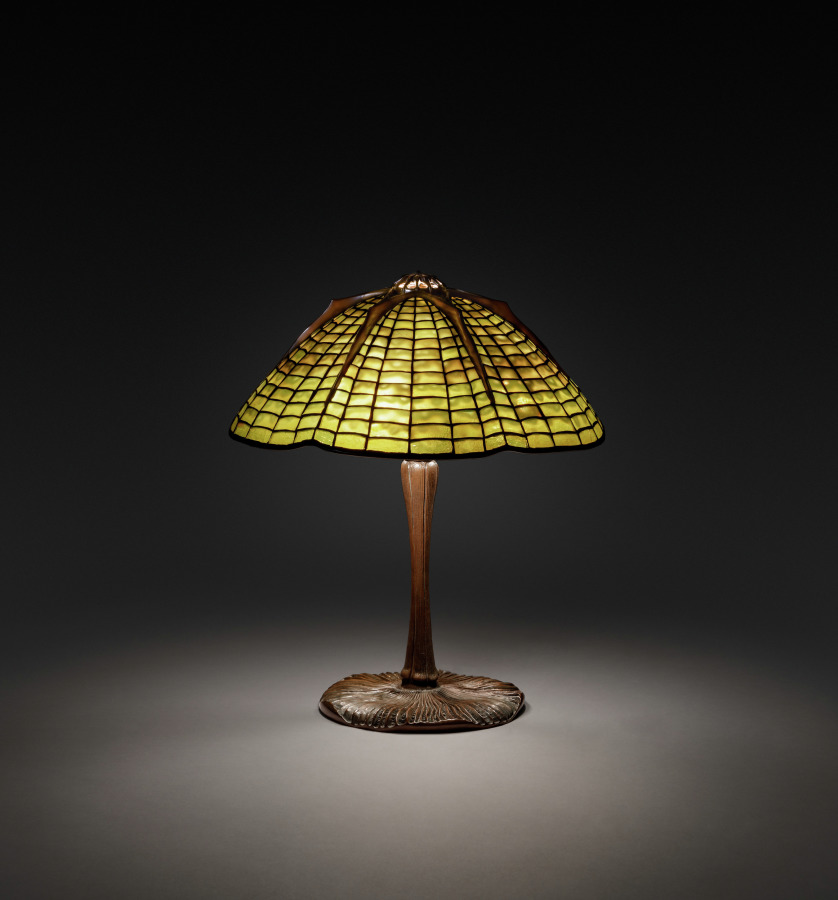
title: Spider and Web Table Lamp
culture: America, New York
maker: Tiffany Studios (United States, New York, 1902–32)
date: c. 1902–20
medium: Leaded glass, bronze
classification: Lamp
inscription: Shade impressed: TIFFANY STUDIOS NEW YORK 1424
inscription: Base impressed: TIFFANY STUDIOS/NEW YORK/337/ 2844 [scratched]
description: The dawn of the 20th century spurred fresh approaches to design. Louis Comfort Tiffany’s great contribution to this new art movement, termed the Art Nouveau, was not only the shimmering iridescence of his Favrile glass but also the naturalistic compositions of his lamps and windows, which brought him commercial and critical success in both Europe and America. Symbolic themes, such as the lurking spider in his web of this lamp, were a hallmark of Tiffany's Art Nouveau design.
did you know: The base of this lamp resembles an upturned mushroom.